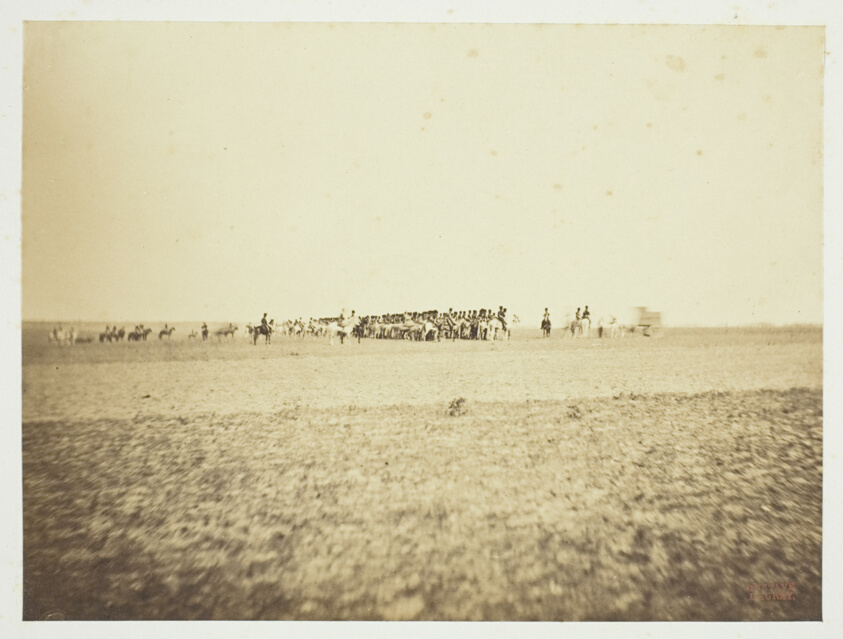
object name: Photograph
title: Untitled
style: 19th century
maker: Gustave Le Gray (French, 1820–1884)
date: 1857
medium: Albumen print, from the album "Souvenirs du Camp de Châlons"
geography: France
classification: albumen silver print; photographic process; photography; photograph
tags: Paris